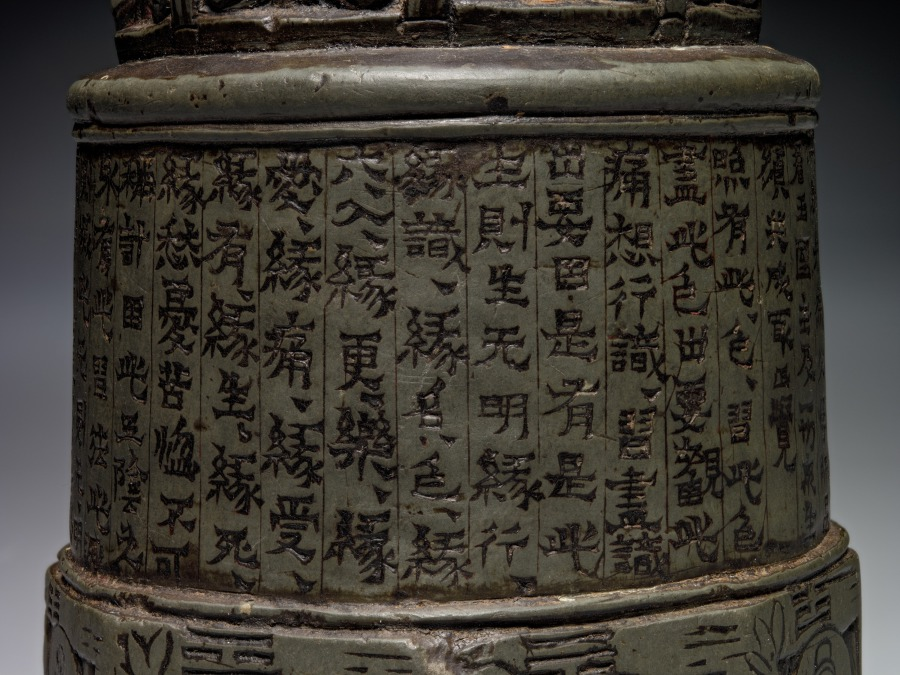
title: Miniature Votive Stupa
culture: China, Gansu province, Northern Wei dynasty (386-534)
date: 435 CE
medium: steatite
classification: Sculpture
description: This sutra pillar, inscribed with a sacred Buddhist text, belongs to a group of miniature stupas (jingta) that were found exclusively in the Gansu corridor, Northwest China. Ranging in date between AD 426–36, some of them bear the names of the lay Buddhist donors who commissioned them. A stupa is an architectural round structure built for the veneration of Buddhist relics. Miniature stupas may have commemorated the visit of a sacred site or represented donations to religious communities and sites.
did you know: There are trigrams, three horizontal lines, broken or continuous, above each of the eight bodhisattvas in the stupa's lower section.